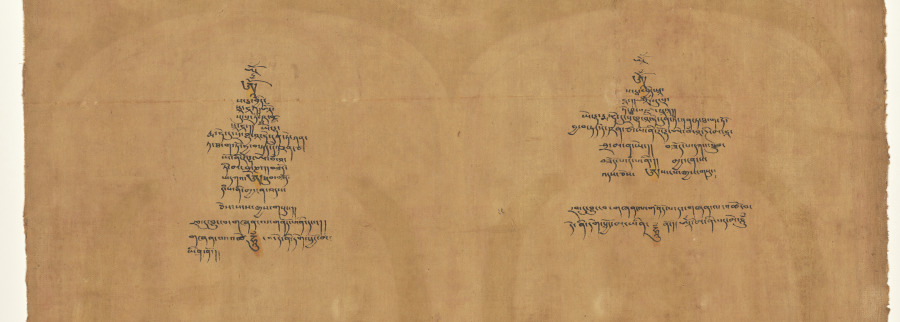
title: Portraits of Two Lineage Masters of the Kagyu Order: Phagmo Drupa (1110–1170) and Tashipel (1142–1210)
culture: Central Tibet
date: c. 1236–1310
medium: Gum tempera on sized cotton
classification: Painting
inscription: [1] ōṃ ŌṂ [2] sa rva vyid [3] svā hā// ōṃ [4] su pra ti ṣṭha vajra [5] svā hā// ye dha [6] rma he tu pra bha vā he tun te śan [7] ta tha ga to hya va tad de ṣan ca [8] yo ni ro dha ye vaṃ vā [9] ti ma [hā] śra [ma] ṇa// bzod [10] pa dka’ A thub bzod [11] daṃ pa ni[//] mya ngan ’das [12] ces sangs rgyas gsung// [13] rab tu byung ba gzhan la gnod pa ni dang// [14] gzhan la ’tshe HŪṂ ba de ni dge sbyong ma [15] yin no//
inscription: [1] ōṃ ŌṂ [2] sa rva vyid svā [3] hā// ōṃ su pra [4] ti ṣṭha vajra svā hā// [5] ye dha rma he tu pra bha vā he tun te śan ta tha ga to [6] hya va tad de ṣan ca yo ni ro dha e vaṃ vā ṭi ma hā [7] śra ma na ye// bzod pa dka’ thub [8] bzod pa daṃ pa ni// mya ngan pa [9] ’das ces A sangs rgyas gsung: [10] rab tu byung ba gzhan la gnod pa dang[//] gzhan la ’tshe ba [11] de ni dge sbyong ma yin HŪṂ no// ōṃ ma ni pad me hūṃ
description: High-level leaders of Buddhist monastic institutions were frequent portrait subjects of early thangka painting (devotional cloth scrolls) in Central Tibet. The lama (Tibetan monk) on the right founded Taklung Monastery in Lhasa, the capital of Tibet, which became an important institutional center of the Kagyu order. He is shown in discourse with his predecessor, whose teacher Gampopa (1079–1153), in turn, is the tiny gray-haired lama centered above them, between the colorful stylized mountain ranges. Their halos, lotus pedestal, and thrones with spitting elephant-trunked crocodiles and rearing griffins elevate them to the level of Buddhas and bodhisattvas. Despite their deification, they are still depicted with individualized facial features.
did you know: The Five Cosmic Buddhas in their six-armed forms are aligned at the top.